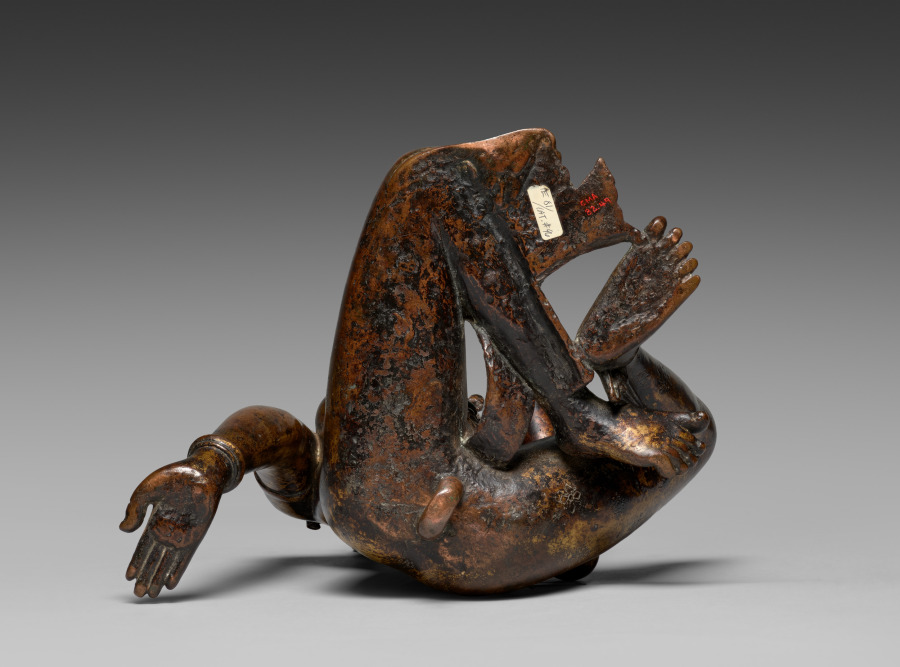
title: Goddess Uma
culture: Nepal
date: 1000s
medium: gilt bronze and semiprecious stones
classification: Sculpture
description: Uma is a mother goddess, and she is depicted here as turning toward her consort, the Hindu god Shiva, a companion sculpture from which this image of Uma has been separated. The grace and femininity of this solid-cast figure are balanced by her confident gesture and expression. She embodies the creative energy of god and the beauty of his creation. In Nepal, Hinduism and Buddhism have continued to flourish simultaneously, in contrast to Tibet, which is predominantly Buddhist, and India, where Buddhism was no longer practiced after the 14th century.